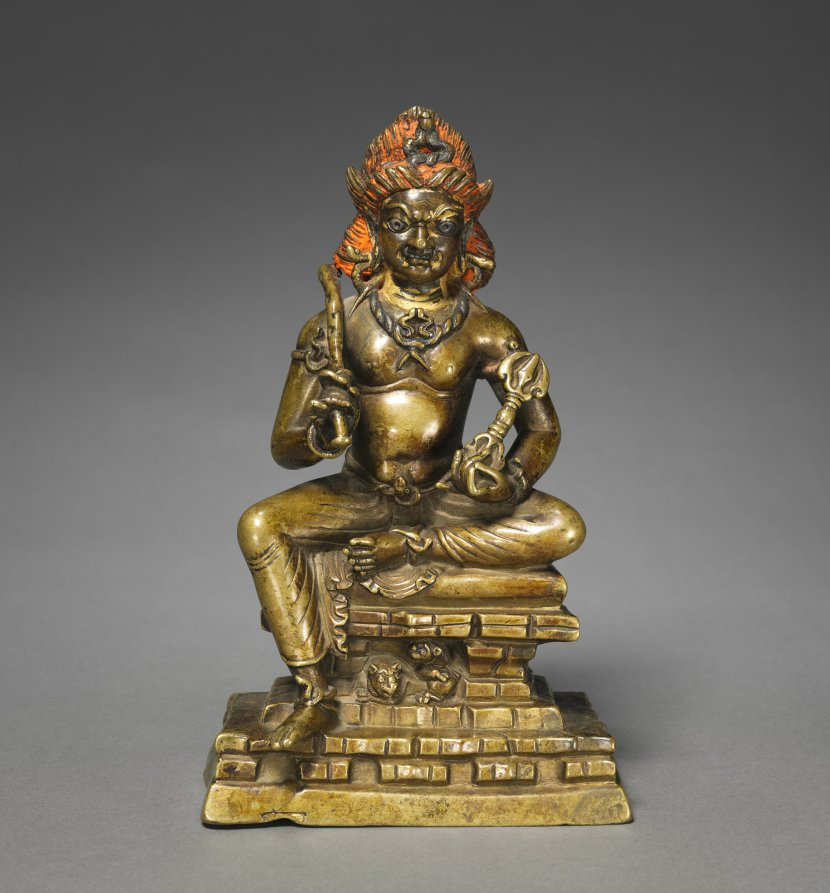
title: Vajrapani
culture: India, Kashmir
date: 700s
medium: bronze with silver overlay and gum tempera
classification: Sculpture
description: The name Vajrapani means “he who holds (pani) the thunderbolt (vajra)” in Sanskrit. Adopted by Buddhists as a protector not only in India and the Himalayan regions of Nepal and Tibet, Vajrapani also was incorporated into art of China, Korea, and Japan. The attributes of the thunderbolt and the club were derived from images of Zeus and Hercules that travelers from the Mediterranean world brought to the region as early as the 320s BC. This rare, early bronze image of Vajrapani visually conveys his power to overcome fear and obstacles to enlightenment, and for this reason he is invoked by Buddhist practitioners. He sits on a pedestal in the form of a rocky mountain populated with wild lions, and he has tamed poisonous snakes to use as ornaments.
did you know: A hole on the back once held a halo behind his head.